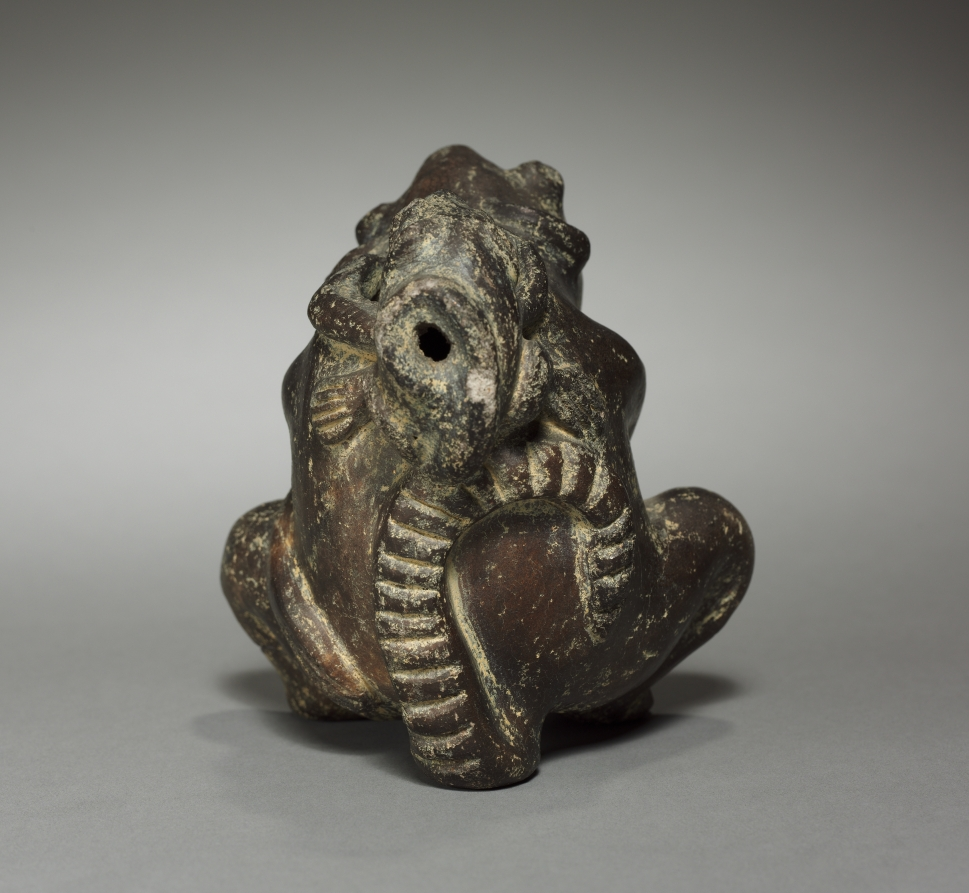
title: Jar in Shape of Grotesque Beasts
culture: Colombia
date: before 1921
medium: pottery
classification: Ceramic